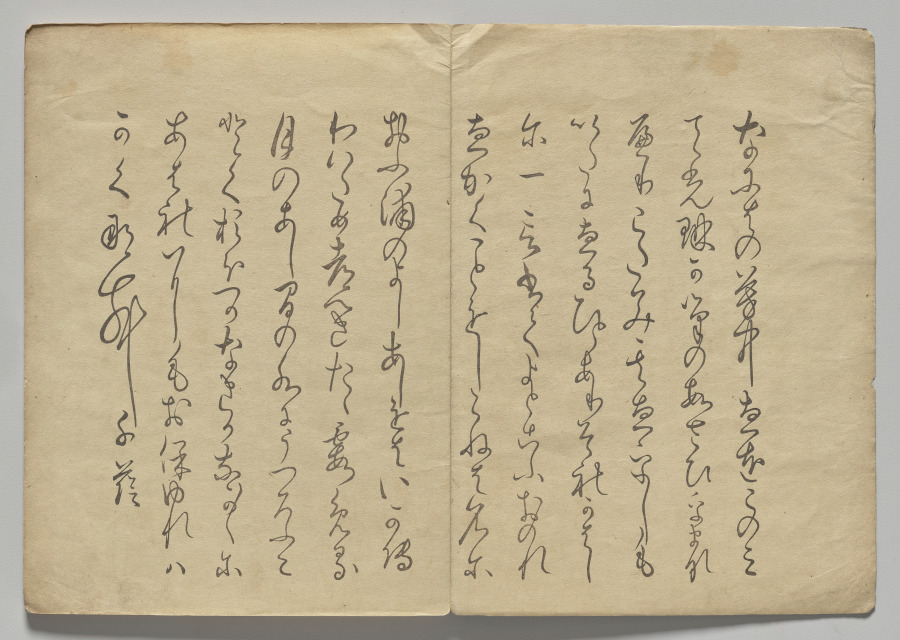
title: Scene from The Kōrin Picture Book (Volume 2)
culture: Japan, Edo period (1615–1868)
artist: Nakamura Hōchū (Japanese, d. 1819)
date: 1800s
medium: color woodblock printed book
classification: Bound Volume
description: Ogata Korin (1658-1716) was one of the most admired artists of Rimpa, or "decorative school painting." These books by the charming later-generation Rimpa artist Hochu record Korin's inventive designs.